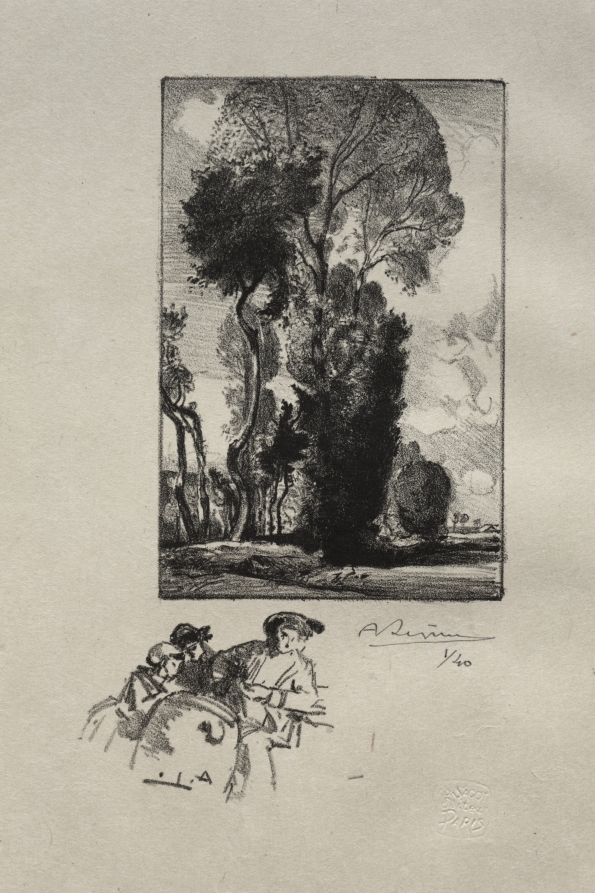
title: Le Bocage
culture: France, 19th-20th century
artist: Auguste Louis Lepère (French, 1849–1918)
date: c. 1870–1918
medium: lithograph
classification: Print